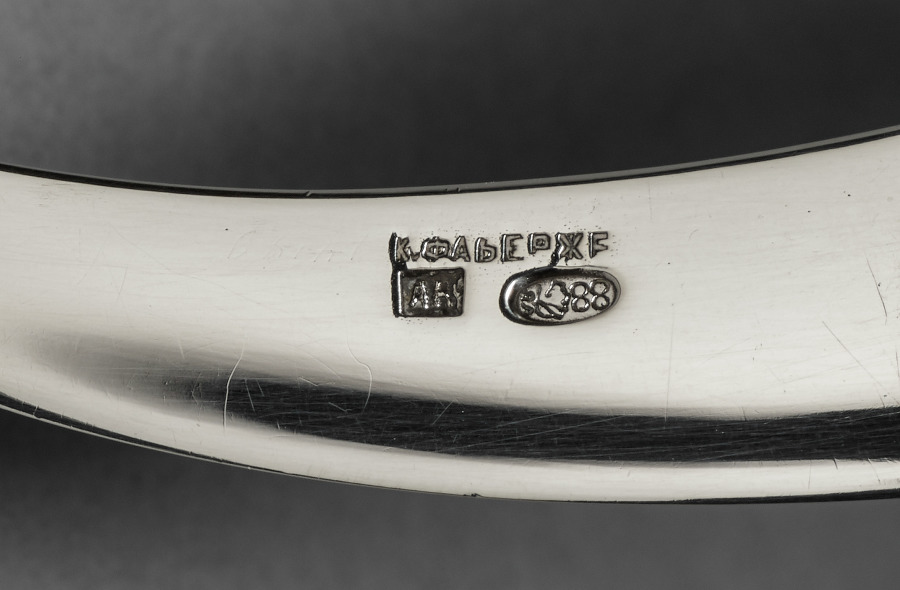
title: Letter Opener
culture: Russian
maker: House of Fabergé (Russian, 1842–1918)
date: c. 1899–1908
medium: Silver, bear claw, garnet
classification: Silver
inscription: “K. Fabergé” in Cyrillic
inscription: Cyrillic initials “AR”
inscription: kokoshnik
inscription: “88” silver standard